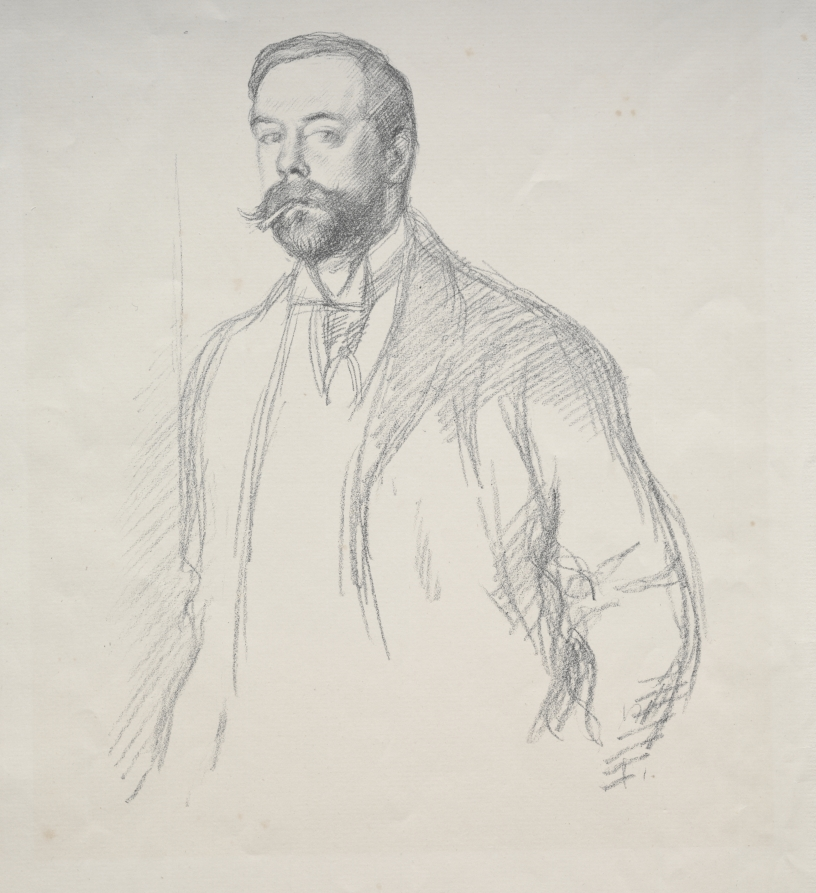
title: John Singer Sargent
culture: England, late 19th-early 20th century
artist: William Rothenstein (British, 1872–1945)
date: c. 1897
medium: lithograph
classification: Print